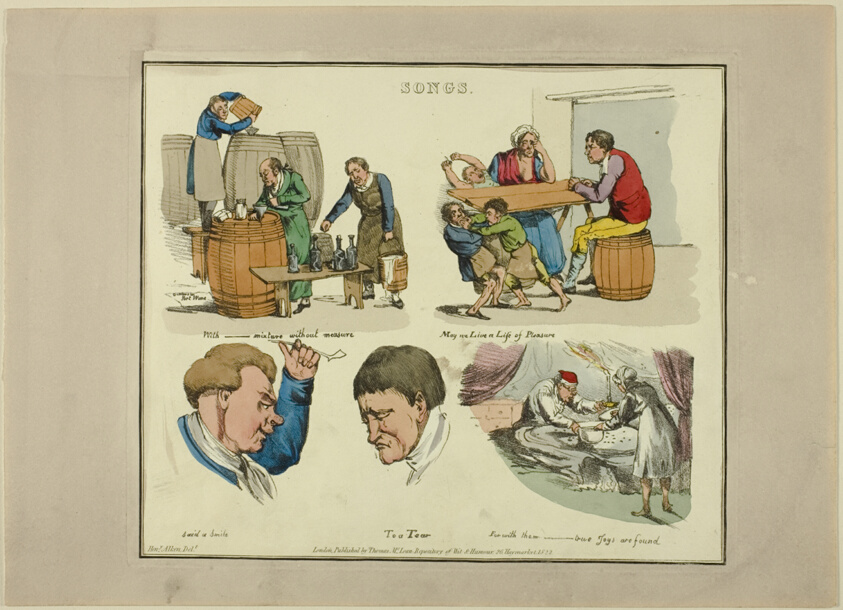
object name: Print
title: Plate from Illustrations to Popular Songs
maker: Henry Alken (English, 1785-1851); published by Thomas McLean (English, active 1790-1860)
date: 1822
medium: Soft ground etching with hand-coloring and aquatint on paper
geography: England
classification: etching; print; prints and drawing